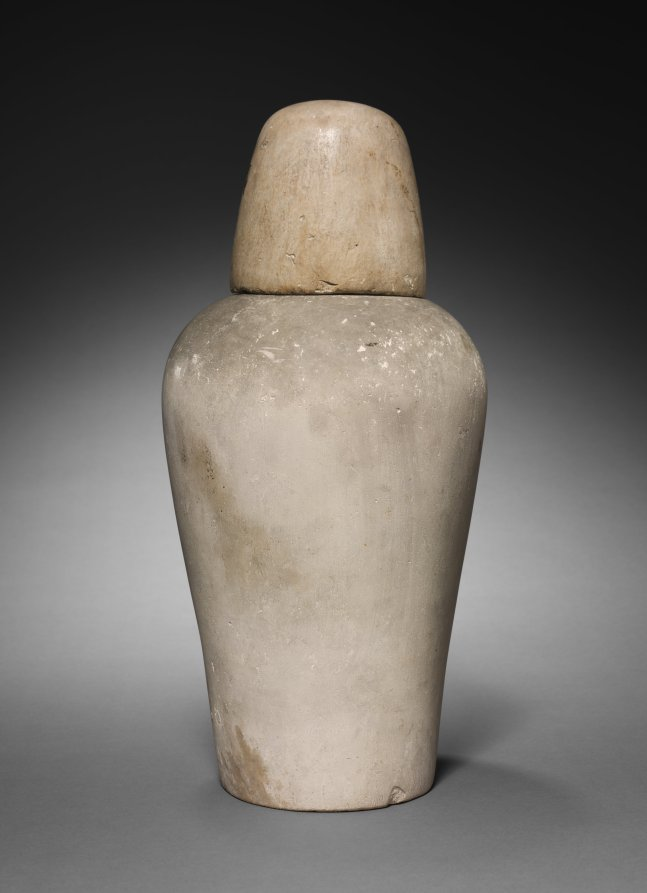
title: Canopic Jar with Lid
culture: Egypt, New Kingdom (1540–1069 BCE), Dynasty 18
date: 1540–1296 BCE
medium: limestone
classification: Funerary Equipment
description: Embellished tulle strips delicately wrap around the length of the Dior gown like linen covering a mummified body. As European artists in the 1800s who journeyed to Egypt drew what they saw, for the Dior collection he designed, John Galliano sketched his experiences in Egypt to develop this theatrical collection, merging additional inspirations of medical bandages and fetish fashion. In ancient Egypt, mummification was the most sacred practice performed. Rituals, such as removing organs and placing them in canopic jars, like the one here, and wrapping bodies and putting them in coffins, helped ensure the deceased’s safe passage into the afterlife.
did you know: Canopic jars are named after the Greek sailor Canopus, who was said to be buried at Canopus (Abuqir) in the western Nile delta and worshipped there in the form of a human-headed jar that was actually a form of Osiris and had nothing to do with internal organs. But the term has stuck.